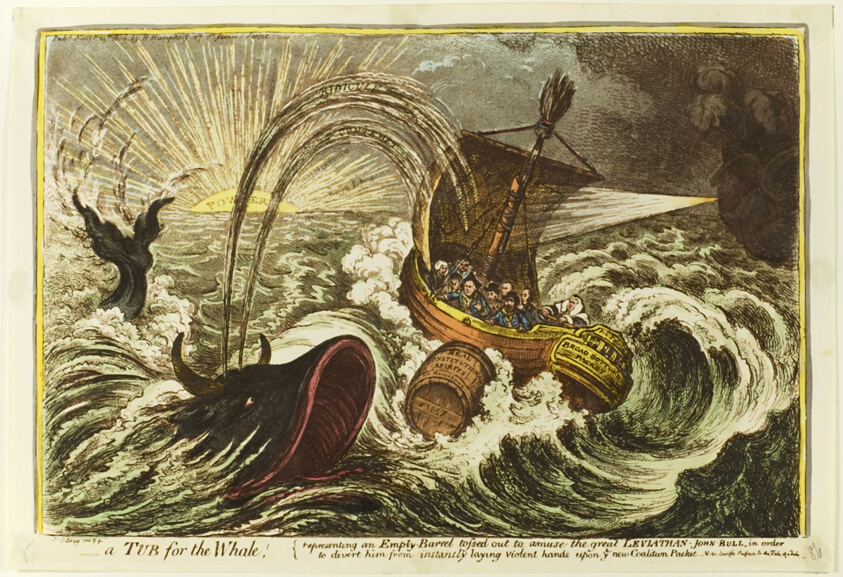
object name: Print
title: A Tub for the Whale!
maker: James Gillray (English, 1756-1815); published by Hannah Humphrey (English, c. 1745-1818)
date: published March 14, 1806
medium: Hand-colored etching and aquatint on cream wove paper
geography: England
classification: etching; print; prints and drawing